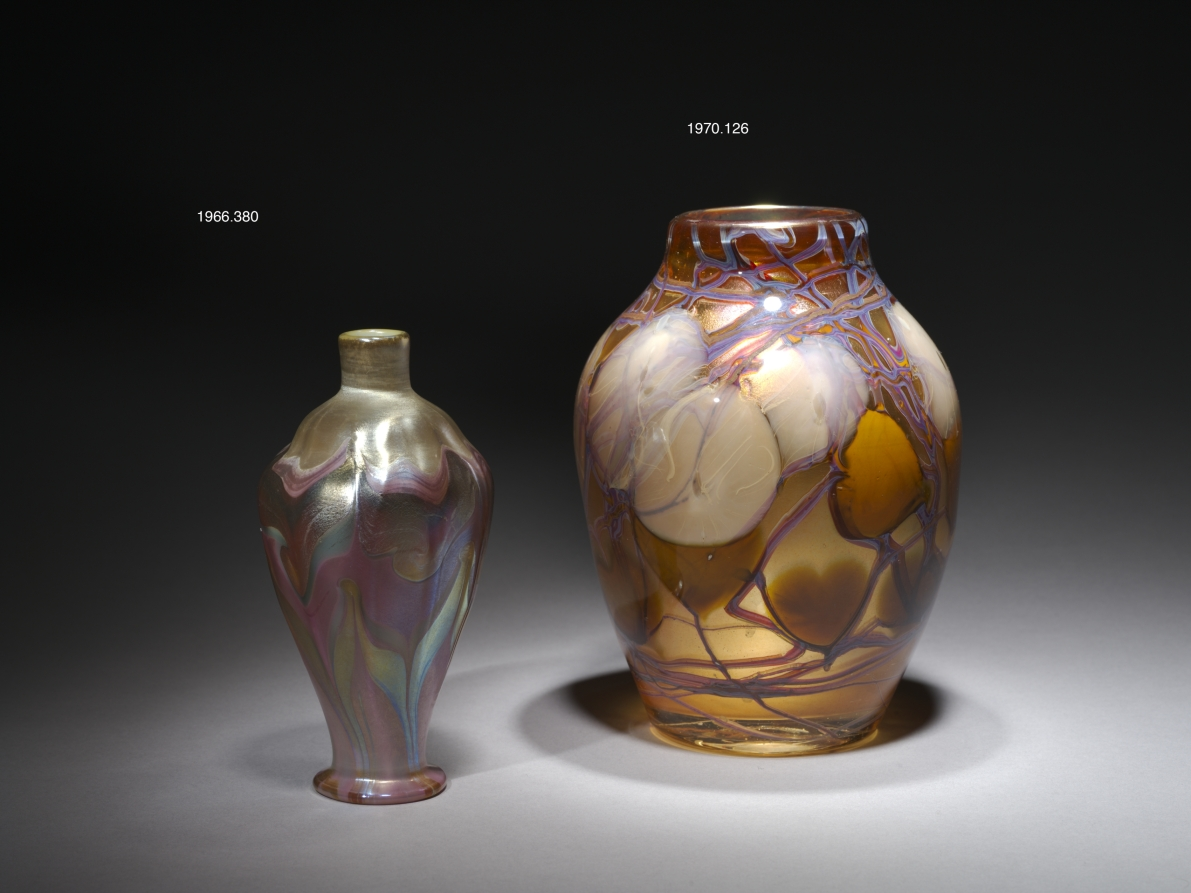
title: Vase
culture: America, New York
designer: Louis Comfort Tiffany (American, 1848–1933)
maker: Tiffany Studios (United States, New York, 1902–32)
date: c. 1905–10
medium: favrile glass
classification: Glass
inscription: inscribed on base: Louis C. Tiffany; L.C.T.; L301.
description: This small vase is made of Louis Comfort Tiffany's signature Favrile glass. Early on when Tiffany began collaborating with glass artists on new types of production, his aesthetic ambitions were realized in the development of Favrile glass, deliberately named to sound French, expensive, and “handmade.” Largely through Tiffany's marketing ability, Favrile glass became America’s greatest contribution to the Art Nouveau style. His works were exhibited at international expositions; galleries in major European cities, where his creations were bought by many museums; and in his store in Manhattan, known as the Tiffany Glass and Decorating Co., later Tiffany Studios. Along with the many shapes and sizes of his decorative vases, Tiffany used Favrile glass in mosaic panels, stained glass windows, and his artistic line of table and floor lamps.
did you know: Introducing various chemicals into the molten glass within the furnace produced multicolored iridescence on the surface when this vase was blown and cooled.